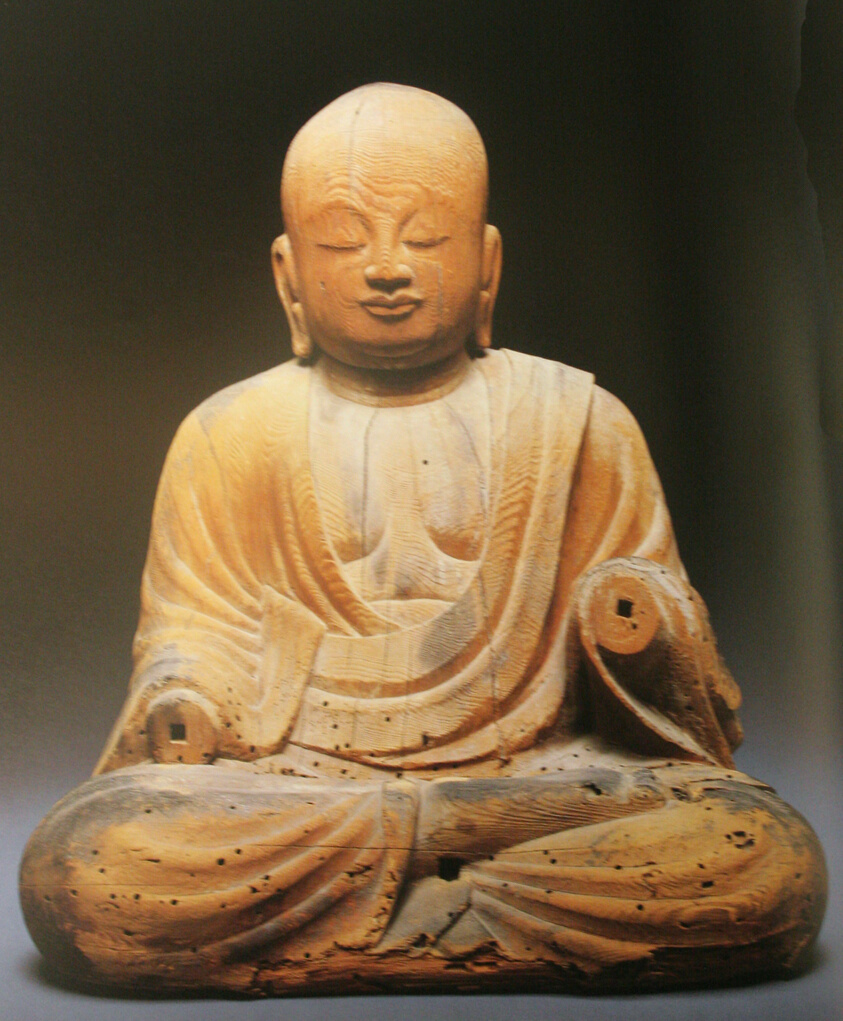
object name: Sculpture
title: Sōgyō Hachiman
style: Japanese (culture or style)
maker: Japan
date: 10th century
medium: Wood with traces of white pigment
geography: Japan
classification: wood; sculpture; asian art